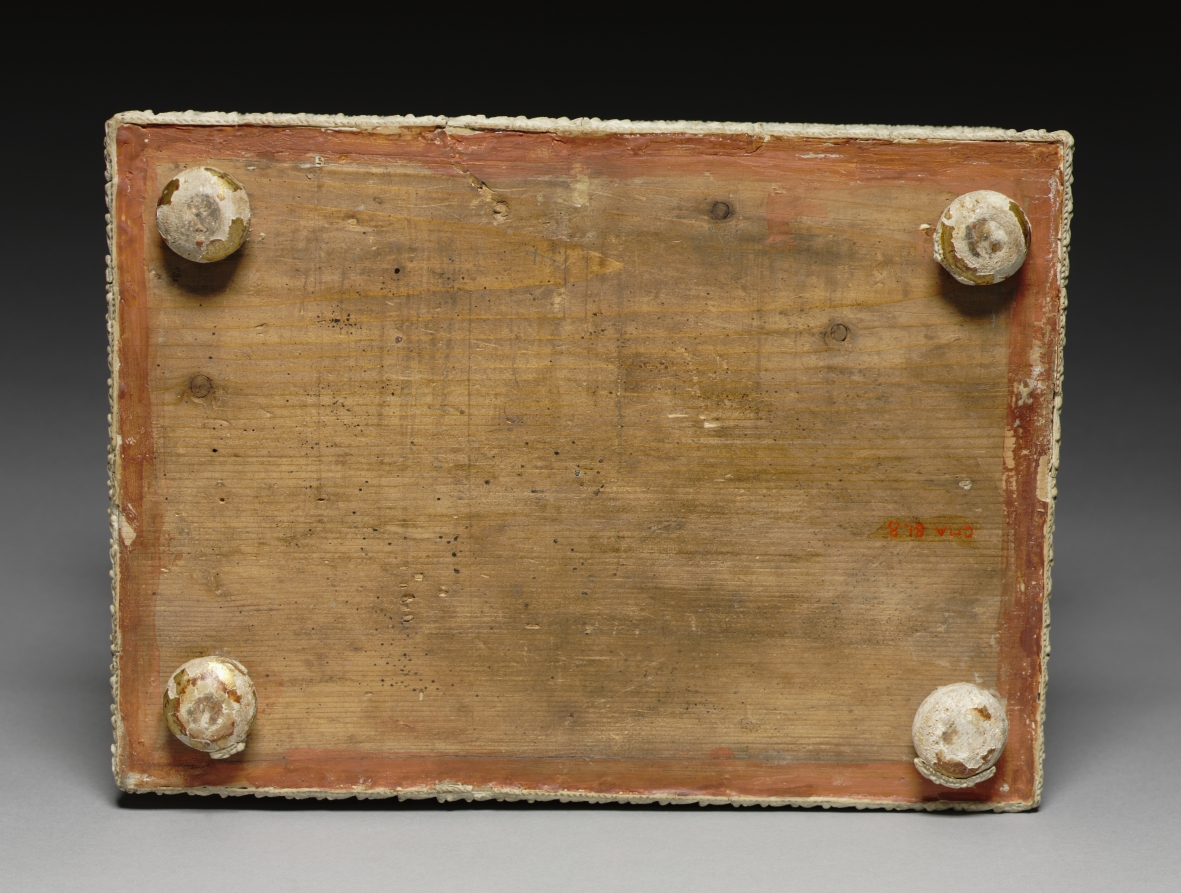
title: Box with Military Scenes from Antiquity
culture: Workshop of the Cleveland Casket (Italy), 16th century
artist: Workshop of the Cleveland Casket (Italian)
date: c. 1520–1530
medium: pastiglia on gilded wood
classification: Furniture and woodwork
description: This box features four military scenes from antiquity: an allegiance, a triumph, a battle, and an execution.